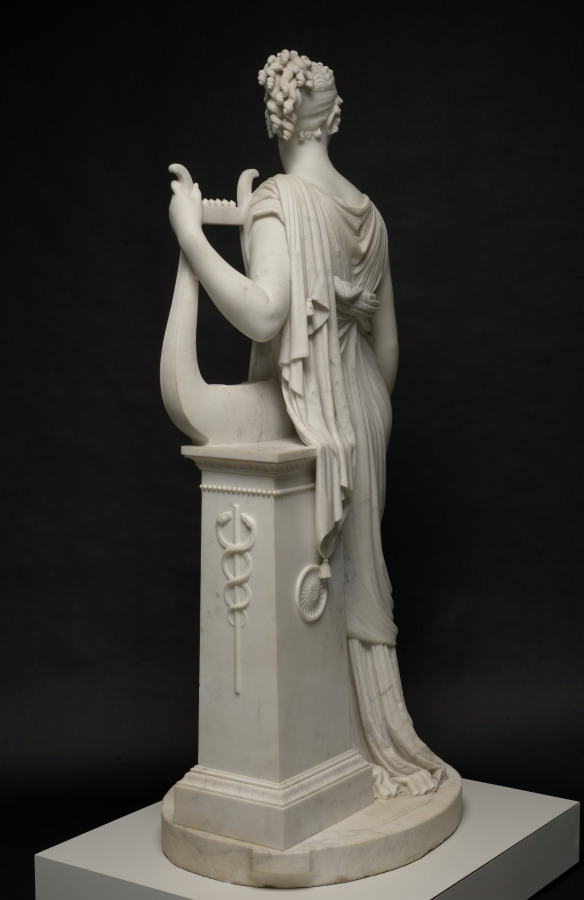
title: Terpsichore Lyran (Muse of Lyric Poetry)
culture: Italy, 19th century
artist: Antonio Canova (Italian, 1757–1822)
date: 1816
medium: marble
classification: Sculpture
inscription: inscribed on front of column: "Terpsichore Lyran" [Terpsichore as the Muse of lyric poetry]; inscribed at base of column: "Canova Fact: 1816"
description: In Greek mythology, Terpsichore was one of the nine Muses, or goddesses of creative inspiration. The lyre, the Greek inscription on the short column, and the caduceus (entwined snakes) on the side identify the figure as Terpsichore Lyran, muse of lyric poetry. This sculpture began with a commission from Napoleon's brother, Lucien, for an idealized portrait of his wife, Alexandrine. Antonio Canova made this version for a British aristocrat and exhibited it in 1817 at the Royal Academy in London to great acclaim.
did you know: Trained by his grandfather, an Italian stonemason, Canova began modeling clay and carving marble sculptures before age ten.